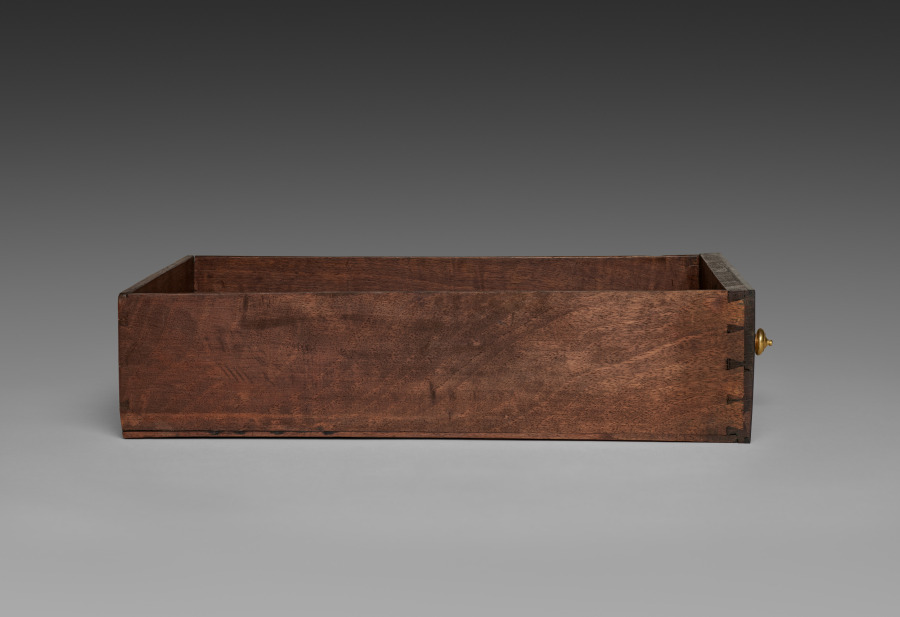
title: Interior Drawer for Cabinet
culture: France, late 17th Century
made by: André-Charles Boulle (French, 1642–1732)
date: c. 1690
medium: ebony, marquetry in metal and tortoise shell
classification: Furniture and woodwork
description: Appointed cabinetmaker to King Louis XIV in 1672, André-Charles Boulle became a master of furniture making in France during the late 1600s until his death in 1732. Known primarily for his use of marquetry, in which metal patterns are inlaid into tortoiseshell then applied within the veneered surface of the furniture, Boulle established a level of quality and craftsmanship few others could achieve. As a result, his work found favor at the royal court and among other aristocrats and diplomats eager to impress the king. The inclusion of a medallion depicting Louis XIV within the bronze decoration of this chest would have identified the owner with the royal court. Often exhibiting stout architectural proportions with elegant groups of inlaid motifs such as the parrot on the central panel of this chest, Boulle’s designs are an example of the intellectual fashion for contrasting ideas, materials, and motifs.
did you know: Originally designed to sit atop an elaborate tall stand, this chest was likely altered in the late 1700s to reduce its scale and height.